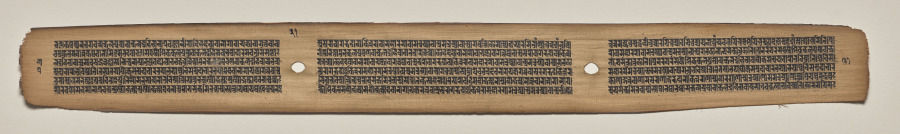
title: Text, Folio 31 (verso), from a Manuscript of the Perfection of Wisdom in Eight Thousand Lines (Ashtasahasrika Prajnaparamita-sutra)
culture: Eastern India, Bihar, Vikramashila Monastery. Painting: Nepal, Kathmandu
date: Sunday, September 14, 1119 (year 239 of the Newar Samvat in the month of Ashvina)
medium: gum tempera and ink on palm leaves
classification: Painting